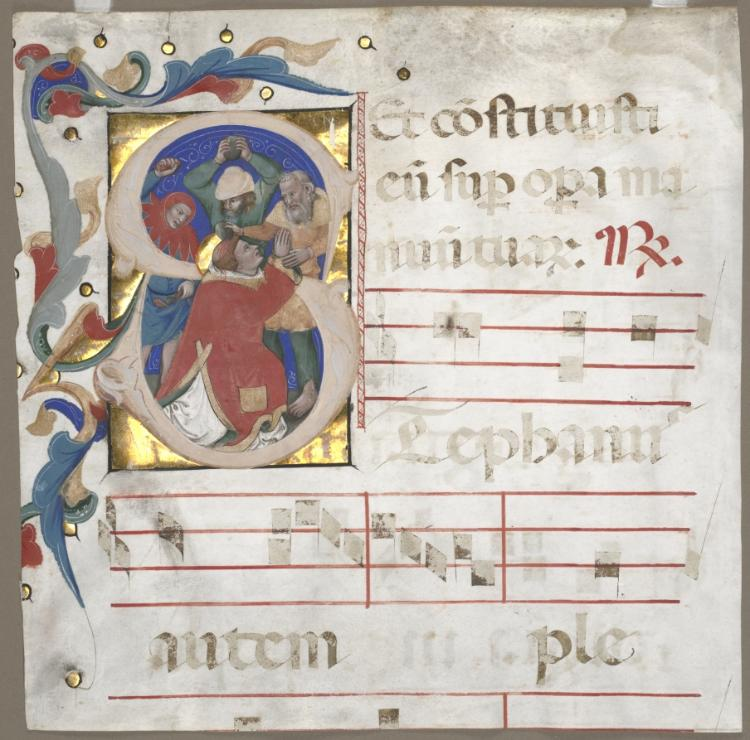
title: Fragment of an Antiphonary with Historiated Initial (S): The Stoning of St. Stephen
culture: Italy, Bologna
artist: Nicolò da Bologna (Italian, c. 1325–1403)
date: c. 1370–72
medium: ink, tempera, and gold on parchment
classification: Manuscript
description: Saint Stephen is honored as the Christian church's first martyr. The illuminator of this initial has crowded the scene of the saint's death within the interior space of the letter S. Stephen emerges from the lower curve as his tormentors hurl stones from above. The center curve of the letter passes between figures to suggest a barrier. The activity of the initial's artist, Nicolò da Bologna, is well documented in Bologna's archives. By the late 1380s he enjoyed the appointment of illuminator to the city. Nicolò and his workshop were frequently called upon to provide the decoration for a large number of corporate registers and statute books in the city, as well as liturgical books for Bologna's various churches.